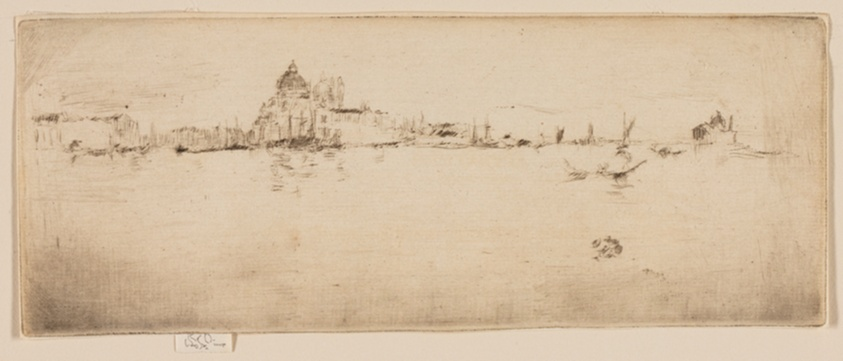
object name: Print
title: Little Salute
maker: James McNeill Whistler (American, 1834-1903)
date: 1879/80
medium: Drypoint in black ink on ivory laid paper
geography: United States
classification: drypoint; prints and drawing; print; paper